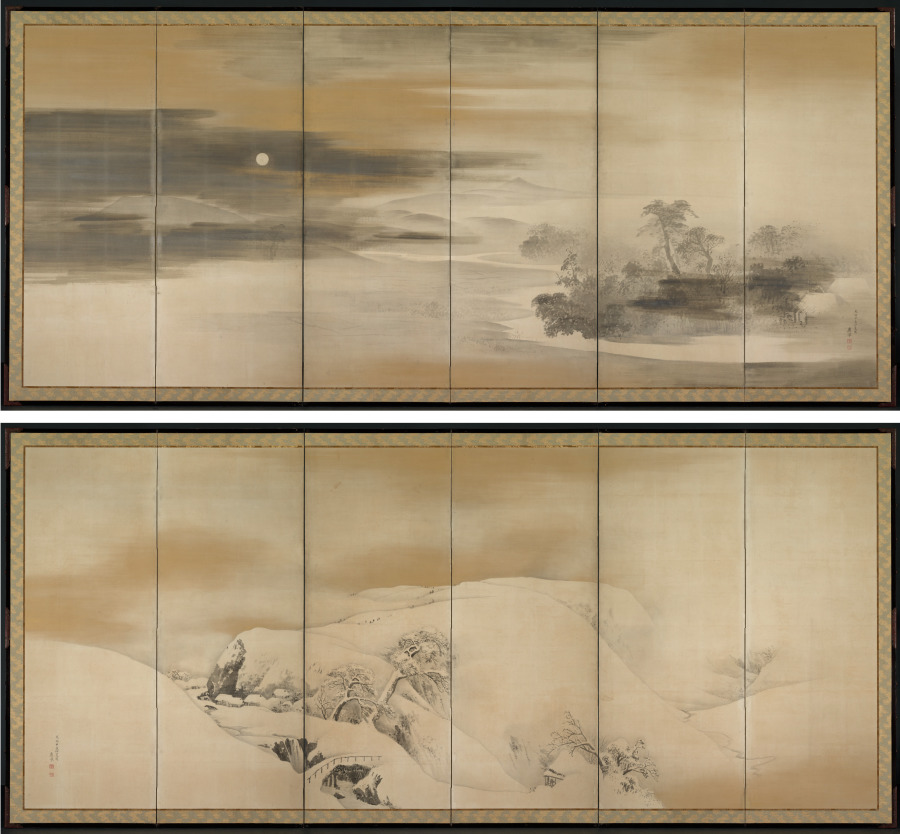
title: Summer Night; Winter Day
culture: Japan, Edo period (1615–1868)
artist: Maruyama Ōkyo (Japanese, 1733–1795)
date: 1784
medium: Pair of six-panel folding screens, ink, gold, and silver on paper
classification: Painting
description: Ōkyo painted these panoramas in the summer of 1784. Regarded as Kyoto's most important painting teacher and accomplished artist, he had studied Western painting techniques, "realistic" sketching from nature, and traditional Japanese style painting (yamato-e). The naturalistic quality of these scenes results from a blend of detailed observation of nature and a remote, even detached regard for man's place in the world.